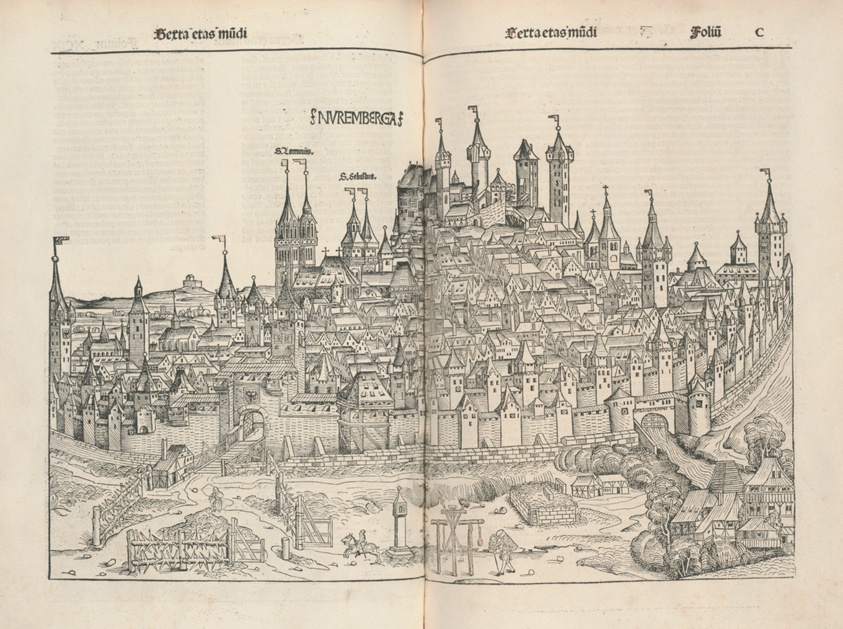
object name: Book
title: Nuremberg Chronicle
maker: Michael Wolgemut and Workshop; German, 1434-1519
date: 1493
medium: Woodcut and letterpress in black, with brush and watercolor, pen and ink on ivory laid paper, in modern full alum-tawed pigskin over wooden boards, sewn on raised bands, with blind tooled lines in frame pattern, blind tooling and hand-lettered title on the spine, and hand-sewn linen headbands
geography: Nuremberg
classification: book